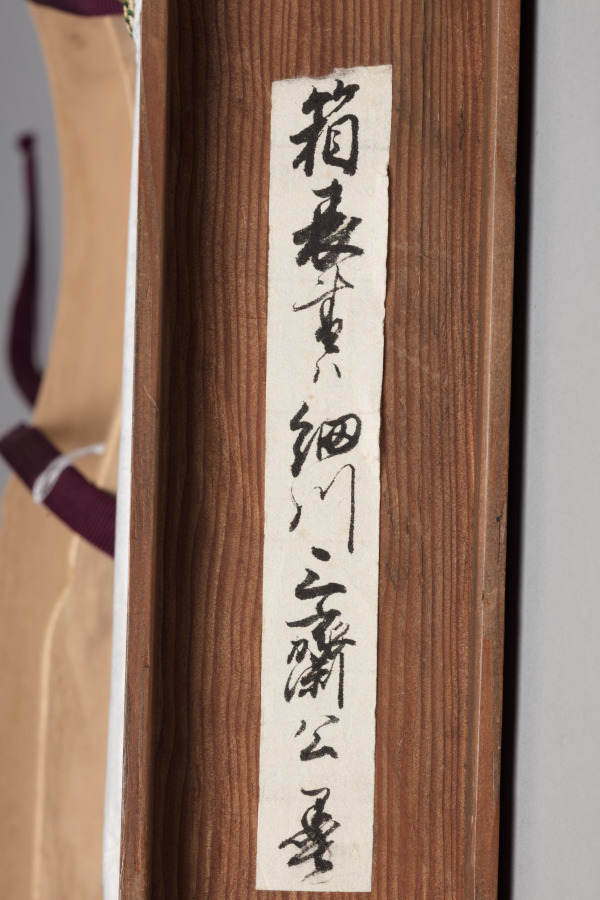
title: Calligraphy with Willow and Swallows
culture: Japan, Muromachi period (1392–1573)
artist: Ikkyū Sōjun (Japanese, 1394–1481)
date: 1400s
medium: hanging scroll, ink on paper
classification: Painting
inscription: How many days has it rid itself of the crow’s cloth? It knows not!/ Lovely is its body so nimble and neat./ Neither men of wealth, courtly position, or power can come close to the unfettered, noble swallow!/ With the coming of spring, it seems to be flying about, dancing around the grass hut of the foolish Priest. signed: Unkasō Isshi Tōkai jun Ikkyū shi ga ippitsu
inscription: outer box inscribed: Ikkyū Ōshō Enshi-zu Jigasan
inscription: inner box side lid inscribed: Showa 50 (1975), November by Tayama Honan with kao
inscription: Inner box side lid inscribed: Ikkyū Ōshō Bokuseki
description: The famed Buddhist monk Ikkyū is best remembered for his calligraphy. Calligraphic conventions of his time called for brushwork that did not vary much in style from character to character. However, as Ikkyū’s lines progress, his brushwork wanders between standard script and a sort of shorthand, marked by an uneven distribution of ink and a reduction of the characters to only the most necessary strokes. Ikkyū’s direct communication of emotion via brushwork became characteristic of the works produced by monks affiliated with the temple Daitokuji later in the Edo period (1615–1868).